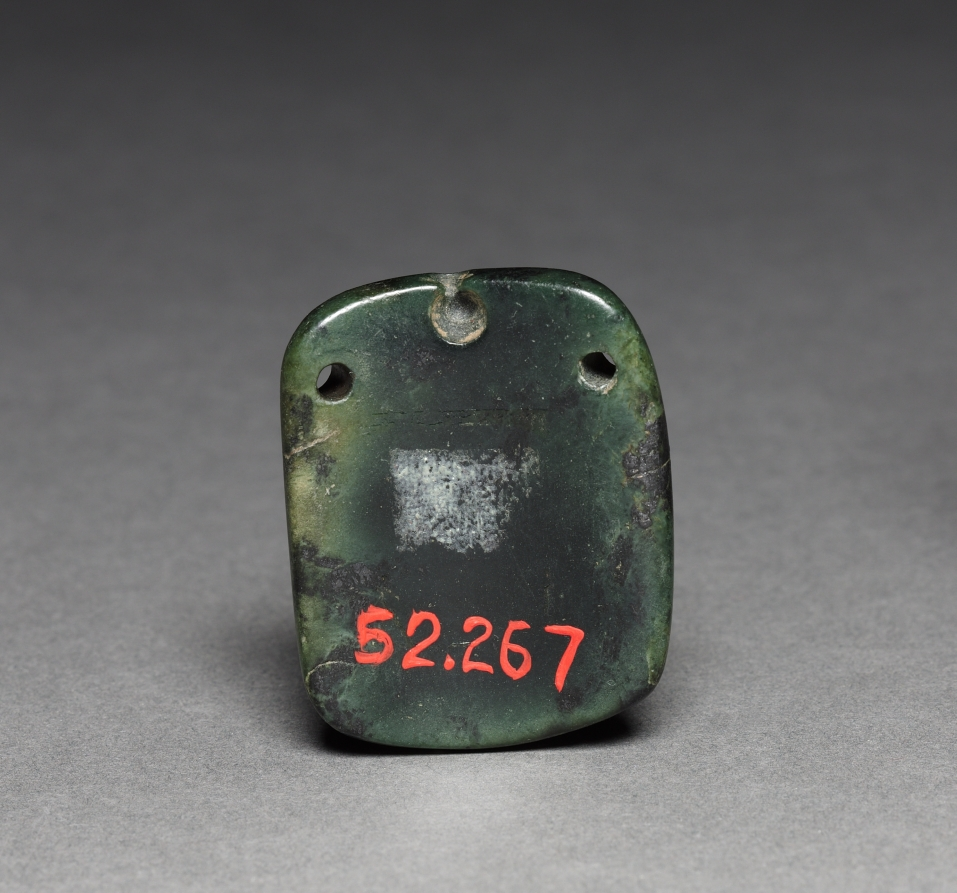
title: Mask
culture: Mesoamerica, Mexico, Olmec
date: 1200–300 BCE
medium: jade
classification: Jade